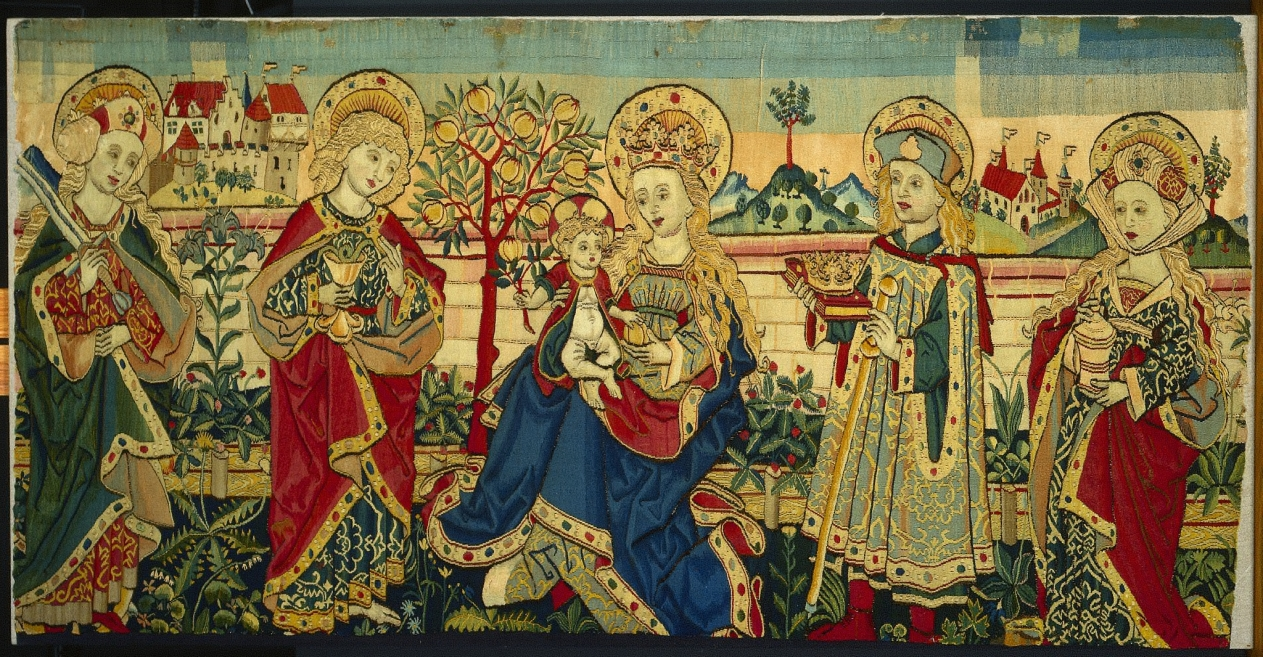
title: Virgin and Child with Four Saints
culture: Germany or Switzerland, Upper Rhine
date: c. 1500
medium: tapestry weave: linen warp, wool and silk wefts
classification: Tapestry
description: Mary and Jesus are seen in front of a wall in a garden that alludes to the Garden of Paradise. They are depicted between four saints: Saint Catherine, John the Evangelist, Jodocus, and Mary Magdalene. The saints wear costumes fashionable around 1475 to 1480. The hanging is said to come from the parish church in St. Lawrence in Nuremberg, Franconia, Bavaria, one of the most important in the commercial city. The appearance of Jodocus may indicate that the textile may have been donated by a wealthy citizen of the same name.